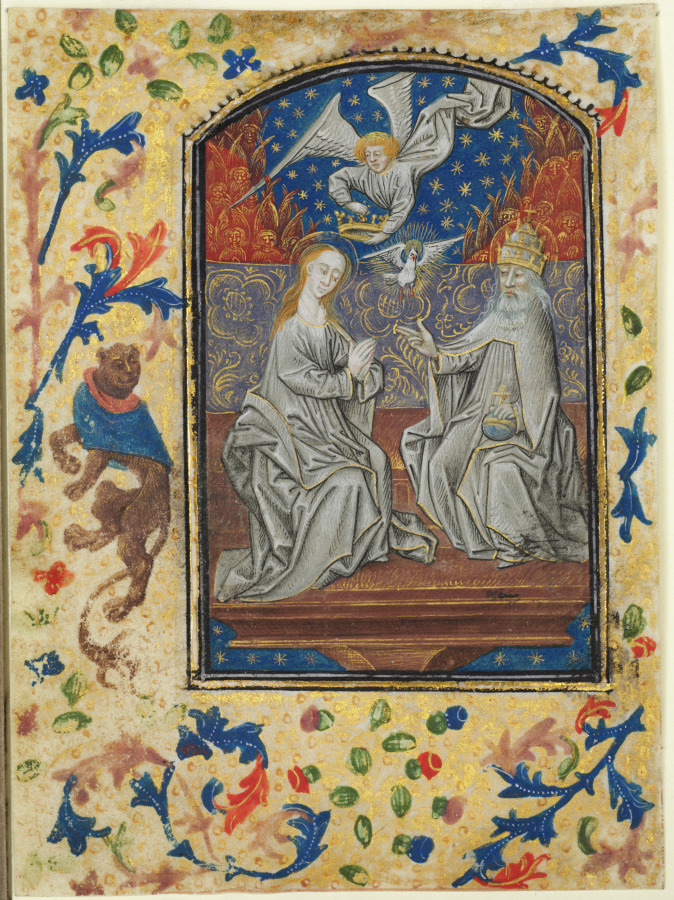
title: Leaf from a Book of Hours: Coronation of the Virgin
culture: Flanders, Bruges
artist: Guillaume Vrelant (Flemish, c. 1454–1481)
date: c. 1470–1480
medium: tempera, liquid gold, and grisaille on vellum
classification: Manuscript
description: Guillaume Vrelant, born in Utrecht, was known to be in Bruges from 1454 onward where he died around 1481. He probably went there to sidestep a 1427 law which banned the sale of Utrecht images. A painter very much in vogue, he founded the Illuminators’ Guild in Bruges under the patronage of Saint John the Evangelist. He is known to have provided manuscripts to the Burgundian court.